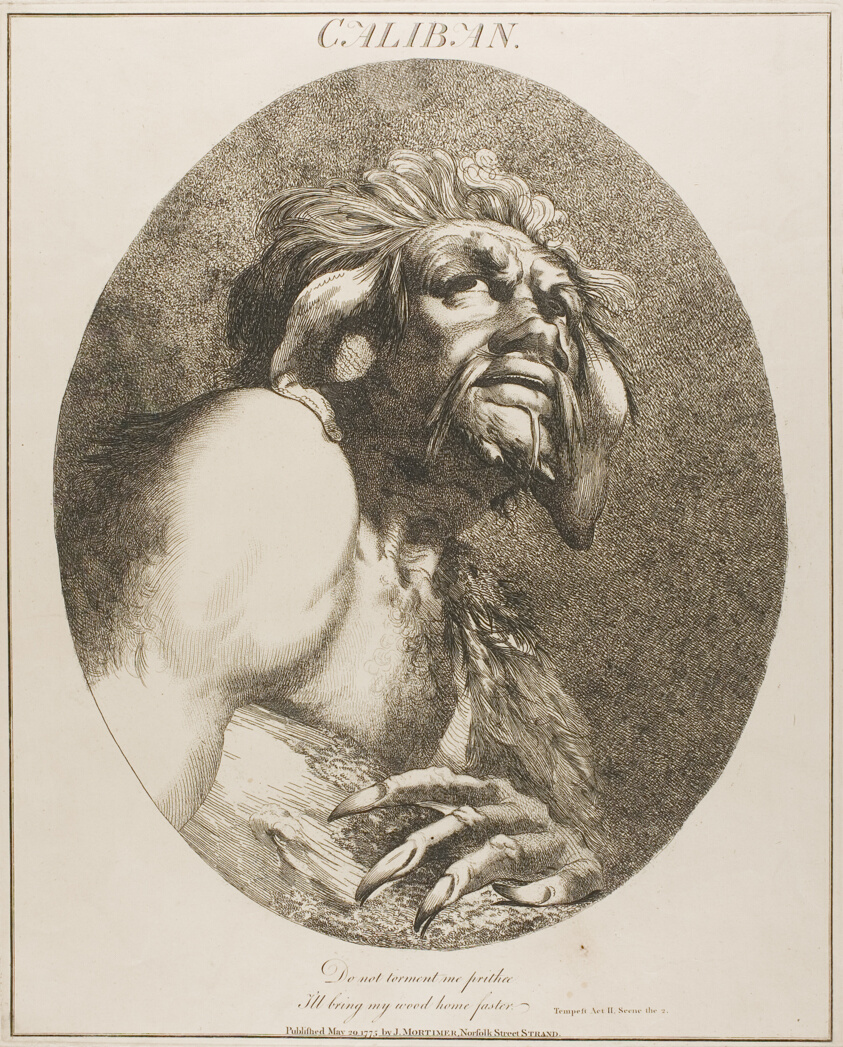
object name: Print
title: Caliban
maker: John Hamilton Mortimer (English, 1740-1779)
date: May 20, 1775 (originally published); published 1809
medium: Etching on cream wove paper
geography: England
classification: etching; print; prints and drawing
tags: The Tempest, literature, prints and drawings